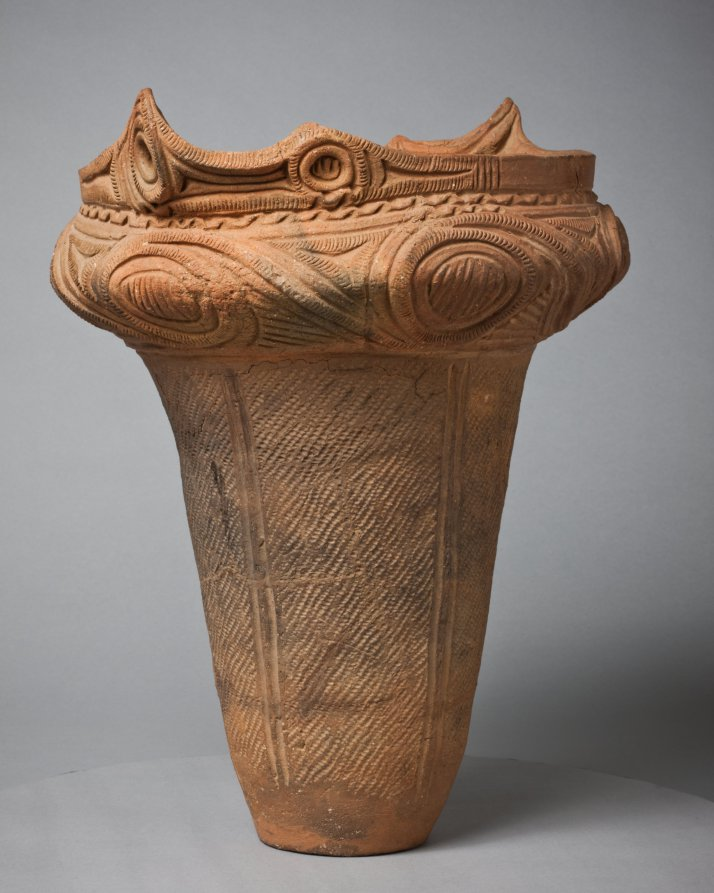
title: Urn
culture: Japan, Jōmon period (c. 10,500–300 BCE)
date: c. 2000 BCE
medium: earthenware, terracotta, impressed and incised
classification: Ceramic